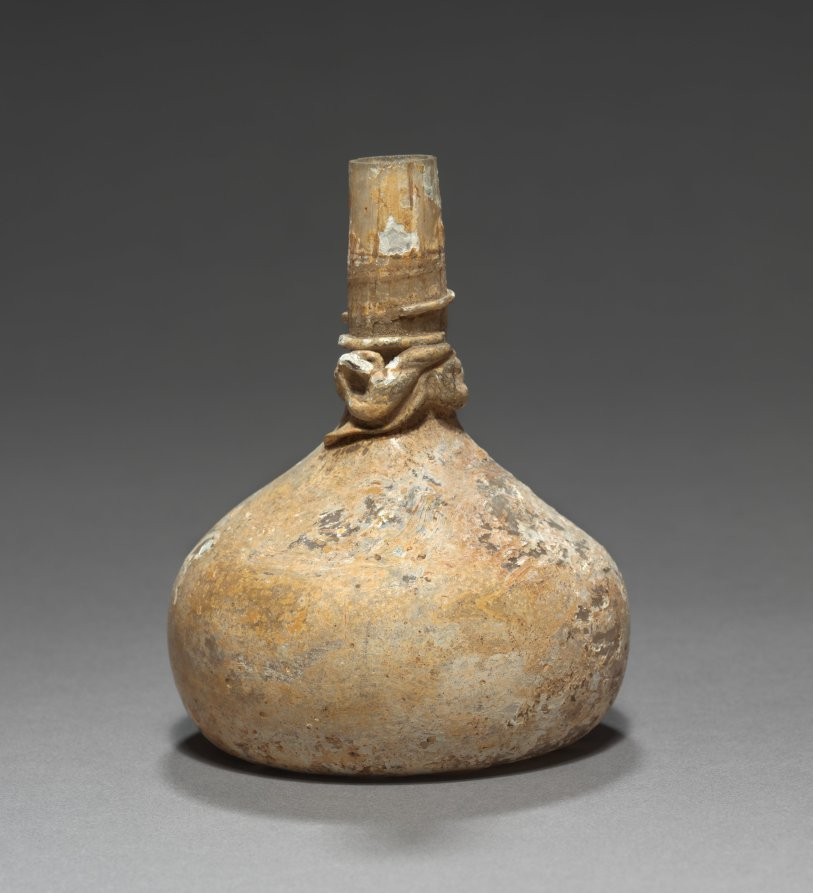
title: Flask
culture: Islamic, probably from Syria/Palestine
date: 800s–900s or later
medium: glass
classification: Glass